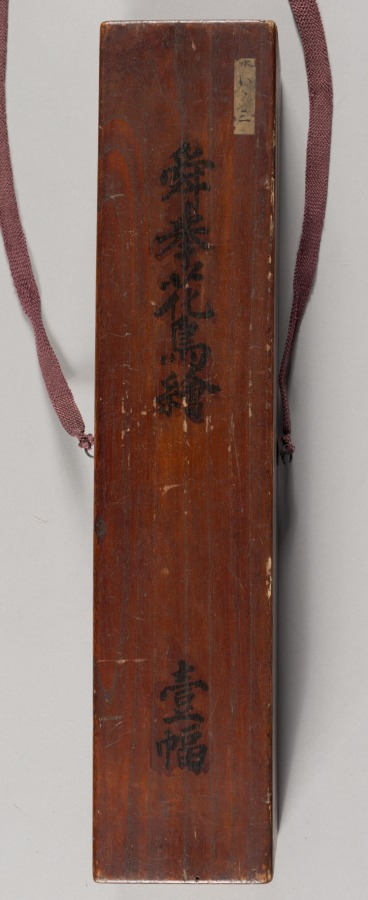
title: Crow on a Pomegranate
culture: Japan, Muromachi period (1392–1573)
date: 1500s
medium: hanging scroll; ink on paper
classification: Painting